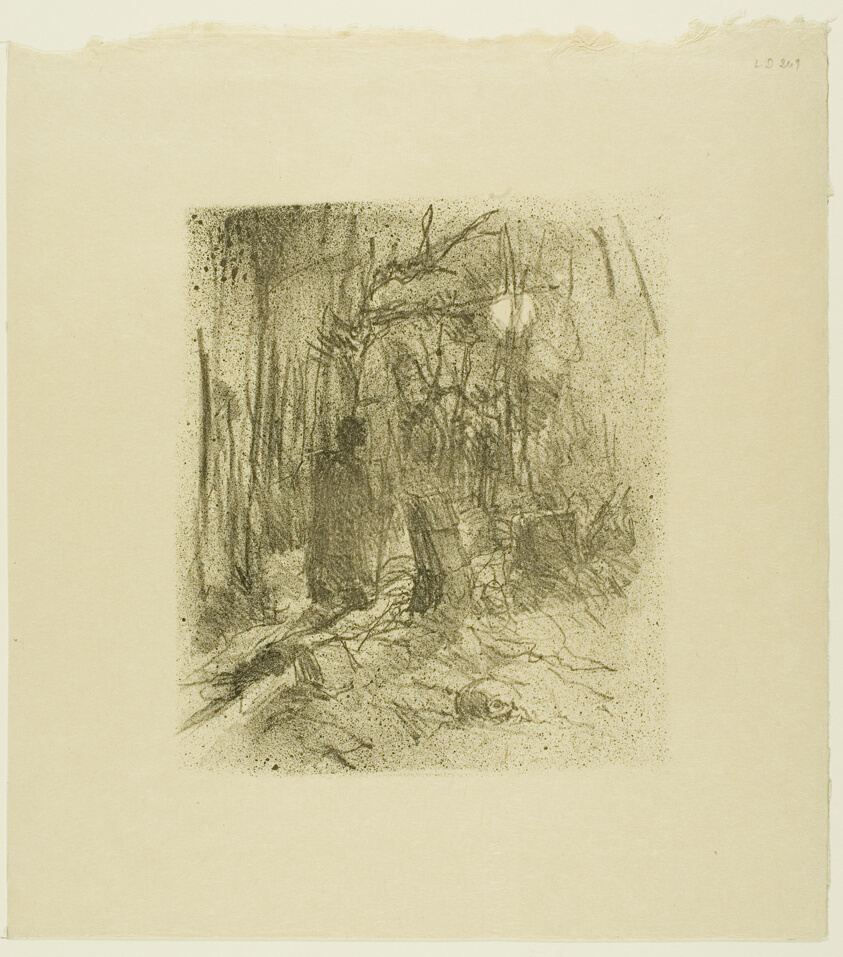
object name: Print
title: Busk Cemetery, from Au Pied du Sinaï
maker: Henri de Toulouse-Lautrec (French, 1864-1901)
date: 1897, published 1898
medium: Lithograph on cream wove paper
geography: France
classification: lithograph; print; prints and drawing